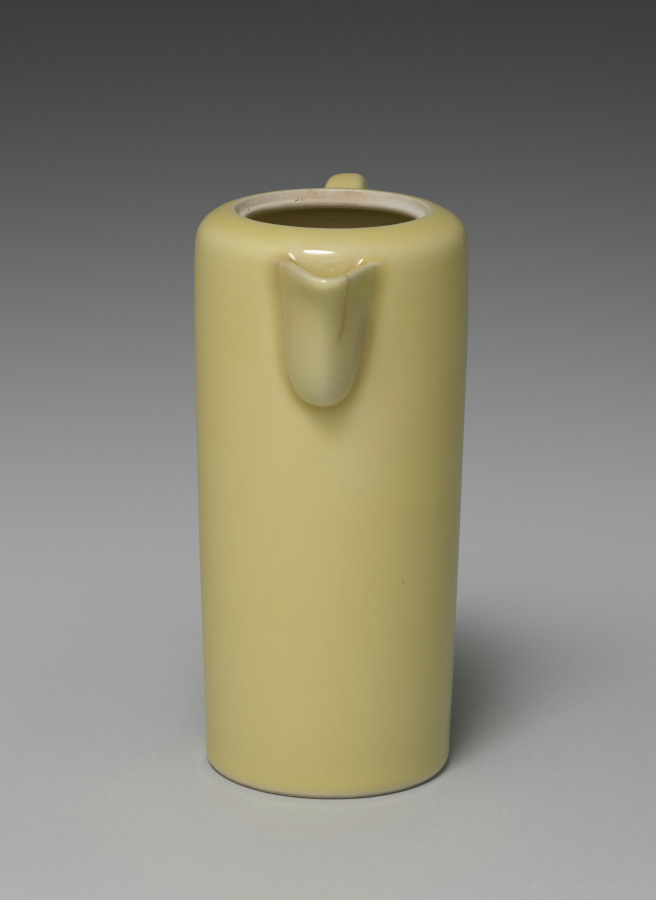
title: Sake Pourer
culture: Japan, Taishō period (1912–26) or Shōwa period (1926–89)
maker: Seifū Yohei IV (Japanese, 1872–1951)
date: 1914–46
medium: Porcelain with yellow glaze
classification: Ceramic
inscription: 清風造 。 【印】 清風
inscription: 成山清風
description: Like his father, Yohei IV also produced works with red or yellow monochrome glazes. His yellow-glazed works include this pair of sake pourers, a set of five drinking cups CMA 2022.217, and a sweets bowl molded into the shape of a chrysanthemum CMA 2022.218.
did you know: The lid's handle is made of bamboo.